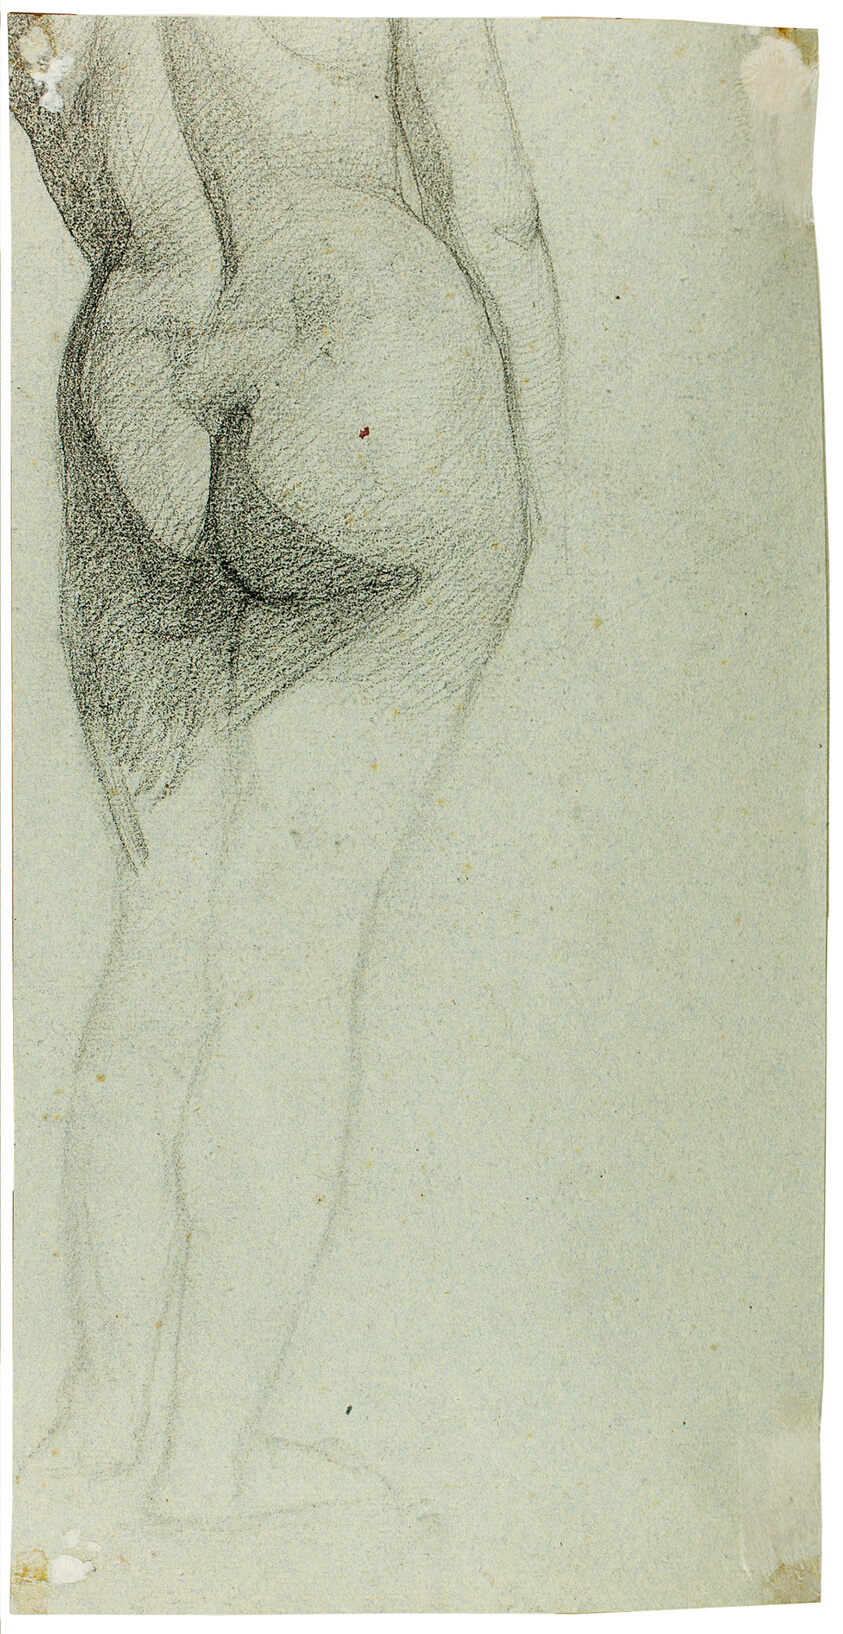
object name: Drawing and Watercolor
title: Nude Woman Seated with Nude Man Asleep (recto); Female Torso Seen from Behind (verso)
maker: Jean Béraud (French, 1849-1935)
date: 1875 (recto); c. 1875 (verso)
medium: Black and white chalk, with stumping (recto), and black chalk (verso), on blue laid paper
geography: France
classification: chalk; drawings (visual works); prints and drawing